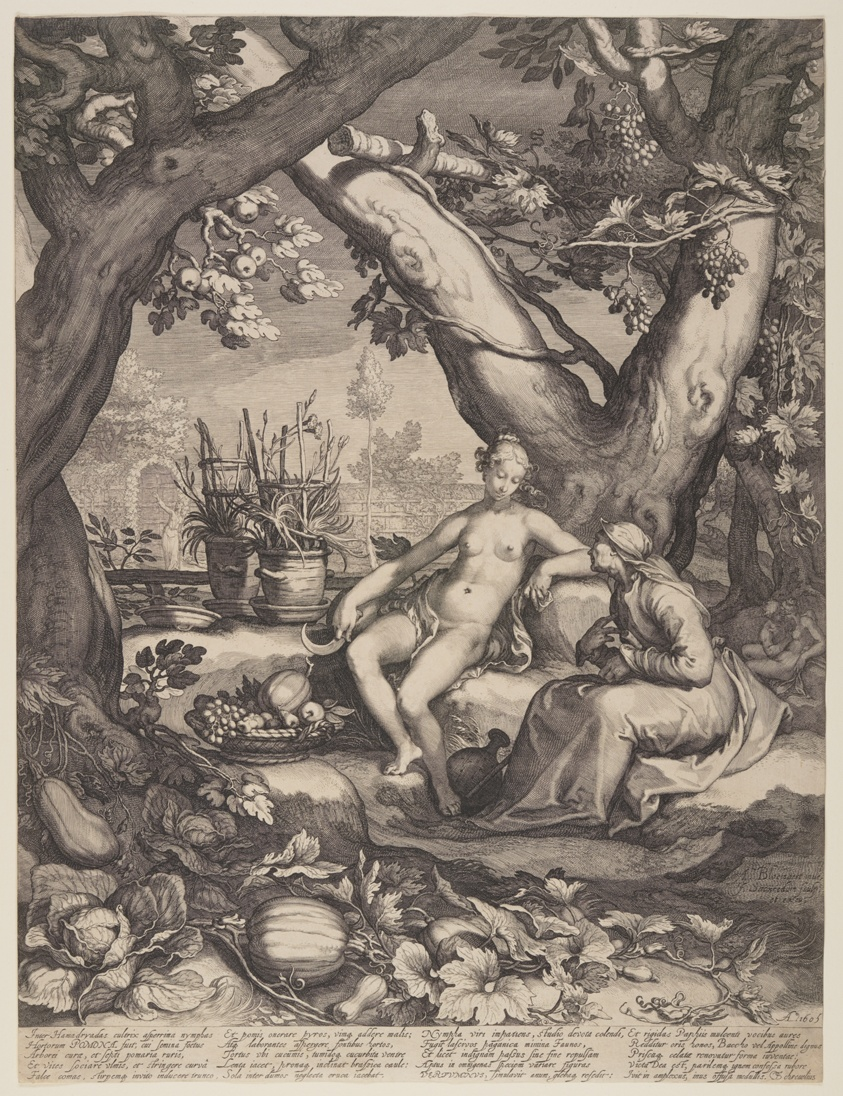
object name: Print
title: Vertumnus and Pomona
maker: Jan Saenredam (Dutch, 1565–1607); after Abraham Bloemaert (Dutch, 1566–1651)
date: 1605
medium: Engraving on ivory laid paper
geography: Netherlands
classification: engraving; paper; print; prints and drawing